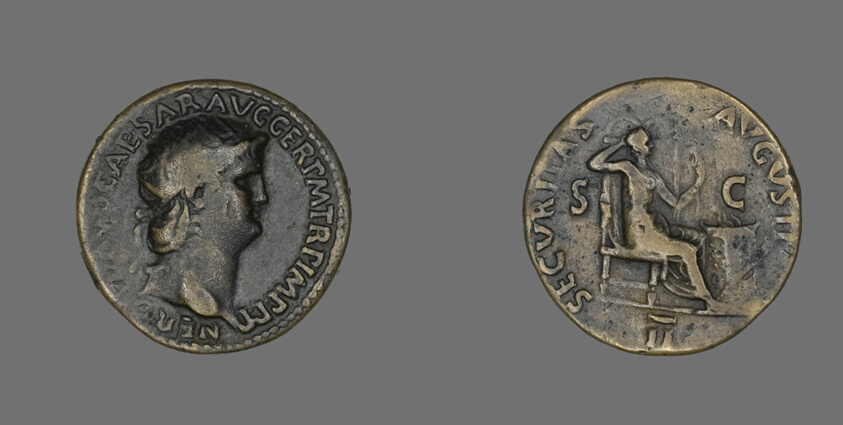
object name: Coin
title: Dupondius (Coin) Portraying Emperor Nero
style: roman (ancient, style or period)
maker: Roman, minted in Rome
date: 63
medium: Bronze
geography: Roman Empire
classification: coin; ancient art